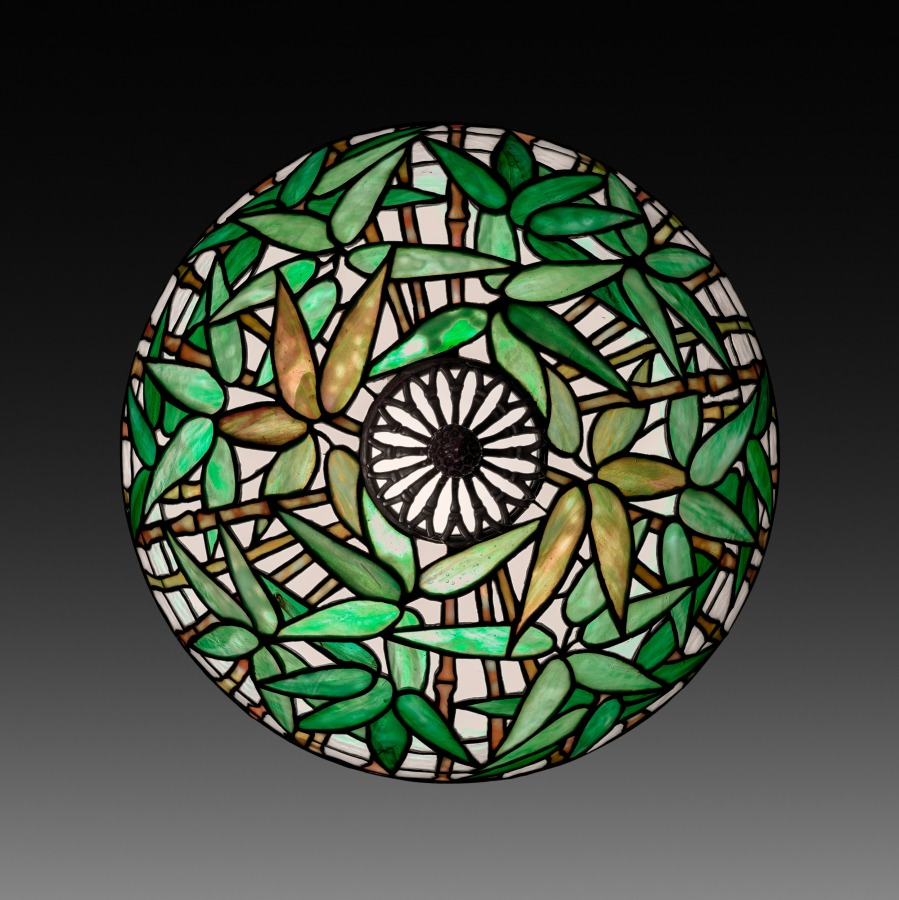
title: Bamboo Table Lamp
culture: America, New York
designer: possibly by Clara Wolcott Driscoll (American, 1861–1944)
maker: Tiffany Studios (United States, New York, 1902–32)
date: c. 1902–10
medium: Leaded glass, bronze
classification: Lamp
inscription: Shade impressed: TIFFANY STUDIOS NEW YORK 1443-14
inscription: Base impressed: TIFFANY STUDIOS/NEW YORK/480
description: Louis Comfort Tiffany was among those who championed lush, sometimes wild-looking displays of varied species in the garden at his Long Island estate, Laurelton Hall. He encouraged his designers to take inspiration from his garden by shipping fresh cuttings almost weekly to his studios. Ohio native Clara Wolcott Driscoll and her team of female designers created floral and leafy patterns for lamps and mosaics that became among the most sought after and commercially successful of Tiffany’s production.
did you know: Although many of Louis Comfort Tiffany's lamp shades were interchangeable with different bases, this bamboo shade was made to match its bamboo style base.